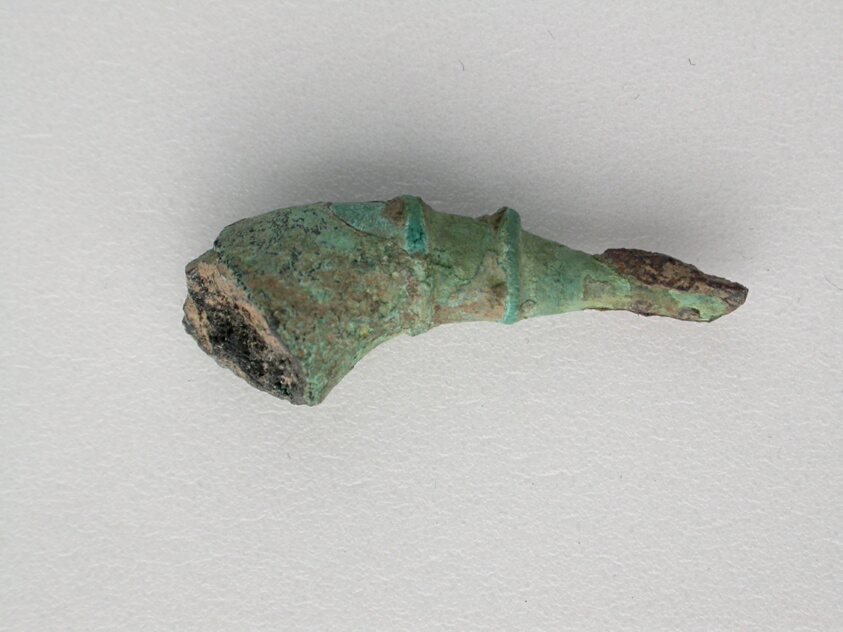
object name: Costume and Accessories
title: Fibula Fragment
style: geometric, ancient, greek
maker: Greek; Thessaly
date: Geometric Period (800–600 BCE)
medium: Bronze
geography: Thessalía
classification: votive offering; ex-voto; fibula; costume